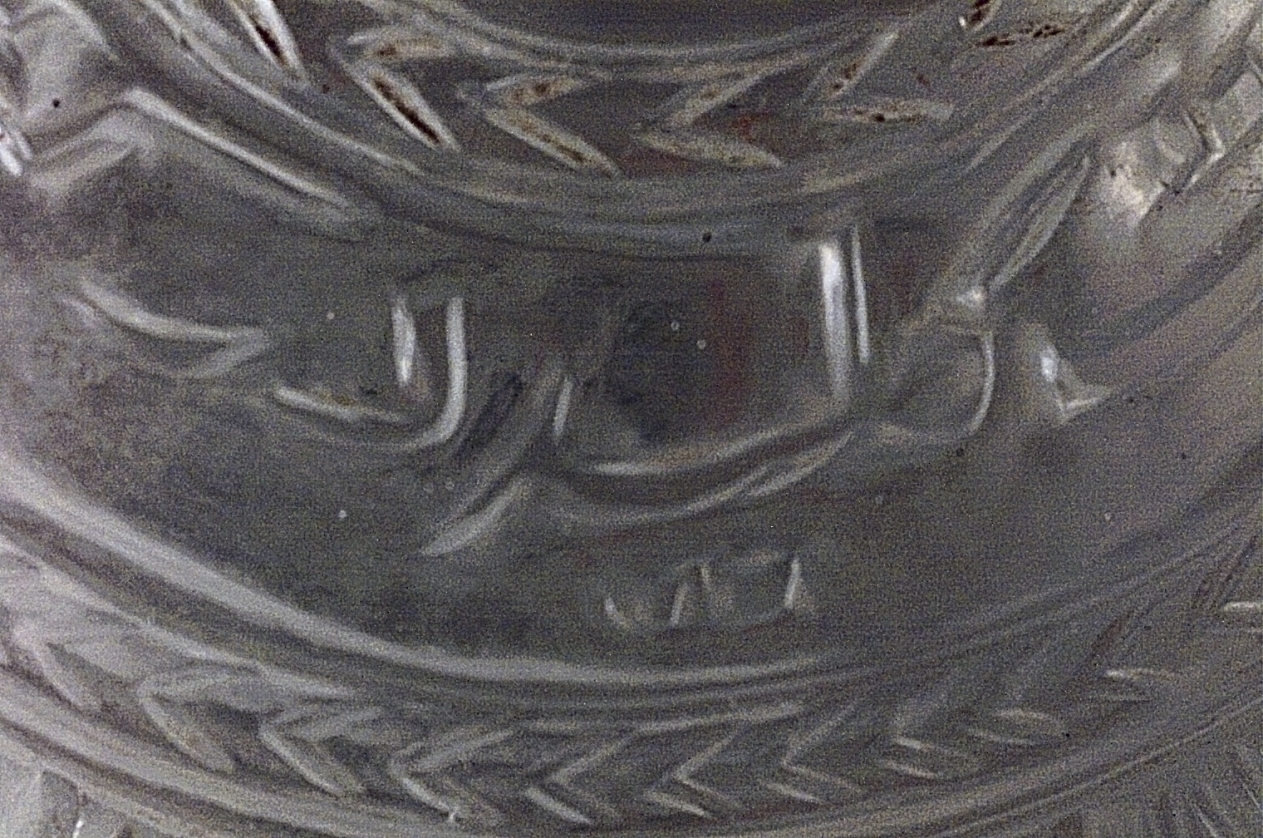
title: Hookah Bowl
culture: India, Mughal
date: 1700s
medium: glass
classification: Glass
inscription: Inscription in Farsi, on body: Even if live charcoal is placed on its head/ The hookah, a teacher of etiquette,/ will not respond unless drawn upon;/ Thus one can learn from its manners of refinement.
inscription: Inscription in Farsi, on shoulder: In the name of Allah the clement and merciful is the key to the wise treasure.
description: The inscription around the body of the base speaks to the use of the hookah in the decadent life of the Mughal court. The hookah is commended for being a proper, refined servant who will not “respond unless drawn upon” or, produce water bubbles when smoke is drawn through the hose. Undoubtedly the witty, poetic allusions would have been appreciated at banquets and other courtly gatherings. The use of wheel-cut glass for this hookah base may have been influenced by English glass and lead crystal that was exported to India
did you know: Around the top of this hookah bowl are incised the opening two lines from the Khamsa (Quintet) of the celebrated Persian poet Nizami (1141–1209).